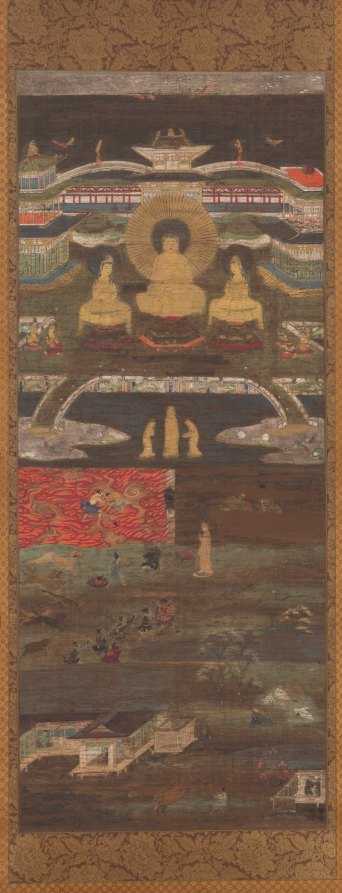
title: The White Path Between Two Rivers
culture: Japan, Kamakura period (1185–1333)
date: 1200s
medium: hanging scroll; ink, color, gold, silver, and cut gold on silk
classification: Painting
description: This painting is a visual presentation of a teaching ascribed to the Chinese Buddhist monk Shandao (善導) (613–681). It describes a challenging journey to the land of the Buddha Amida along a narrow path between a river of fire and a river of water. The story is about escaping the six paths of reincarnation—the heavens and hells, as well as the realms of humans, animals, hungry ghosts, and fierce beings. The Buddha Amida appears at the top in his Pure Land, or Western Paradise.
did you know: The Six Realms of Transmigration are the: heavenly realm, hells, human realm, animal realm, realm of hungry ghosts, and realm of fierce beings.